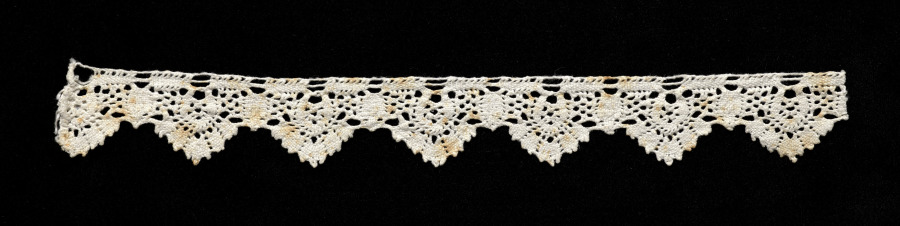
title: Lace Edging of Bell Points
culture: Italy, Abruzzi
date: 1700s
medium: Bobbin lace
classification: Lace